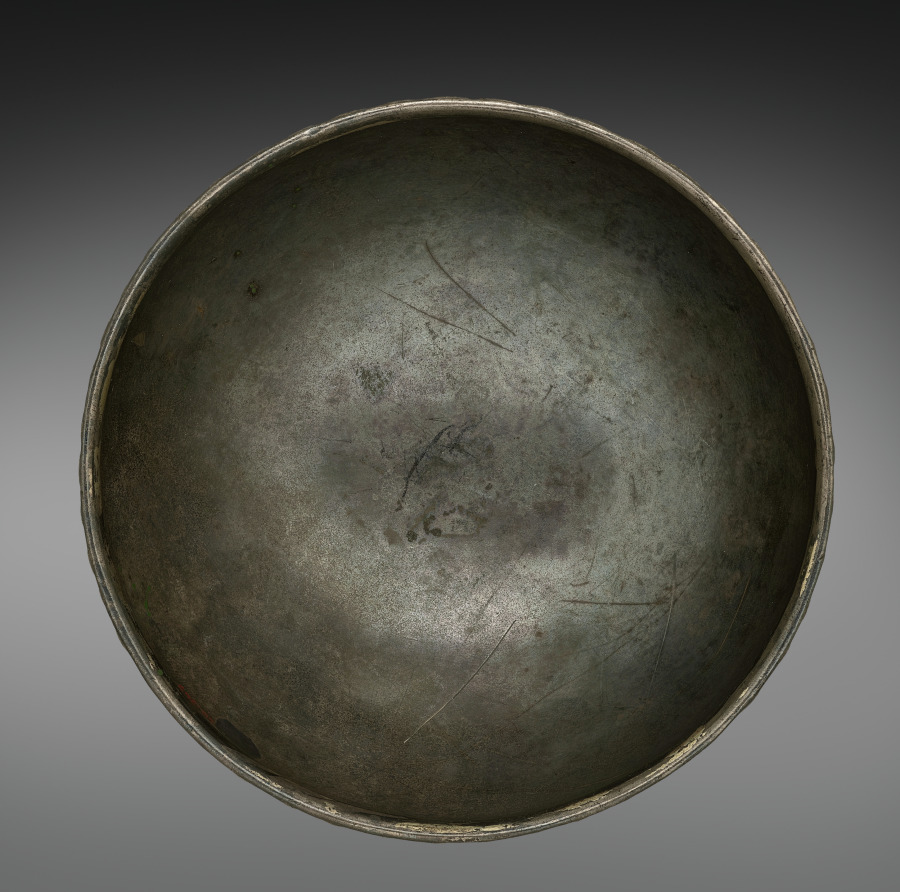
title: Bowl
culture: Iran, Sasanian Empire (224–651 CE)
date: 500–700 CE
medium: silver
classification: Metalwork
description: Every good Zoroastrian was supposed to spend one-third of his day farming; one-third philosophizing; and one-third eating, resting, and at pleasure. The abundance of Sasanian luxury goods is evidence of the importance accorded the last third of the day.